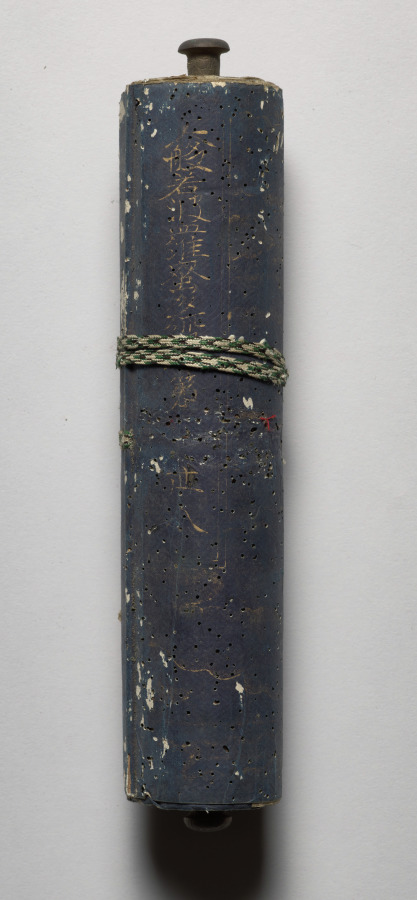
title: Volume from the Great Perfection of Wisdom Sutra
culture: Japan, Heian period (794–1185)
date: late 1100s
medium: Handscroll; ink and gold on dyed paper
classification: Manuscript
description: This scroll is part of the 600-volume Great Perfection of Wisdom Sutra. The sacred text addresses the perfection of wisdom and the nonsubstantiality of all phenomena, or the emptiness of all things. It takes the form of Shakyamuni Buddha’s preaching at four locations. This scroll is from the Perfection of Wisdom in 100,000 Lines, which occupies the first 400 volumes. At one time, religious clergy kept all the scrolls in a lacquered wood repository. They are now too fragile to open and we will conserve them over time.